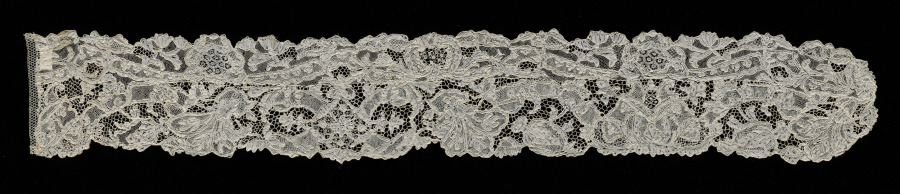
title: Lace Lappet (one of a pair)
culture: France, Alençon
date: 1715–74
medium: Linen: needle lace (Point d'Alençon)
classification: Lace